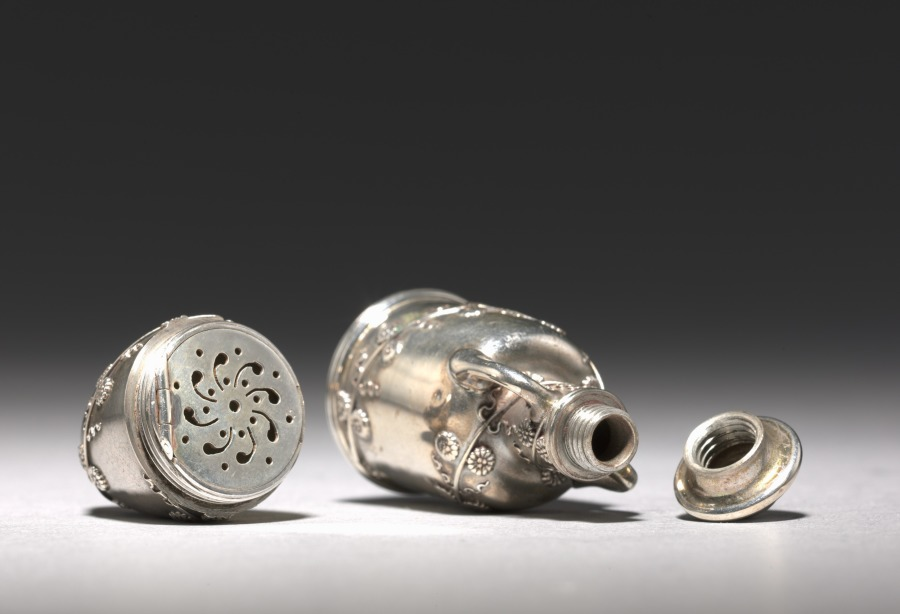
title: Scent Bottle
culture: America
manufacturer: Tiffany & Co. (America, New York, est. 1837)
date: c. 1860–70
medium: silver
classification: Silver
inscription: Inside mark: Tiffany & Co. 2662 (...) - this is too small to read M2108 Union Square